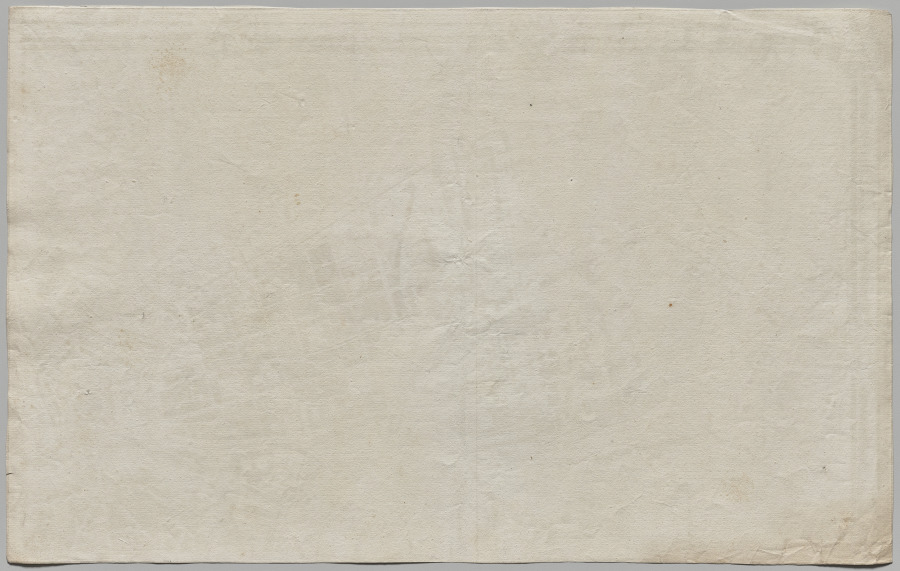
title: Nuova pianta di Roma data in luce da Giambattista Nolli l’anno MDCCXLVII, known as La Pianta Grande di Roma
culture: Italy, 18th century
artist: Giovanni Battista Nolli (Italian, 1701–1756)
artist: Carlo Nolli (Italian, 1690–1790)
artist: Rocco Pozzi (Italian, 1701–1774)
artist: Pietro Campana de Soriano (Italian, 1725–c. 1779)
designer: Stefano Pozzi (Italian, 1699–1768)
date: 1748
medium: etching and engraving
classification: Print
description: The monumental Pianta Grande di Roma, or Large Plan of Rome, which measures about 5 x 7 feet when its twelve plates are assembled, is a landmark in both cartography and printmaking. The map is considered the first scientific rendering of Rome, establishing new standards of accuracy and thoroughness when it was published in 1748. Devised by the Lombard architect and surveyor Giovanni Battista Nolli (Italian, 1701-56), the creation of the map required over ten years of surveying the city carried out by Nolli and a team of assistants with the help of new measuring devices. In Nolli’s “ichnographic” (also called “ground”) plan, architectural features and the urban infrastructure are reduced to a single horizontal slice, a minutely detailed footprint that conveys dimensions, proportions, and orientations to scale with the utmost clarity.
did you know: To make this map, Pope Clement XII granted the mapmaker permission to measure courtyards and other interior, inaccessible spaces in monastic communities, even those in nuns’ convents, which was controversial at the time.